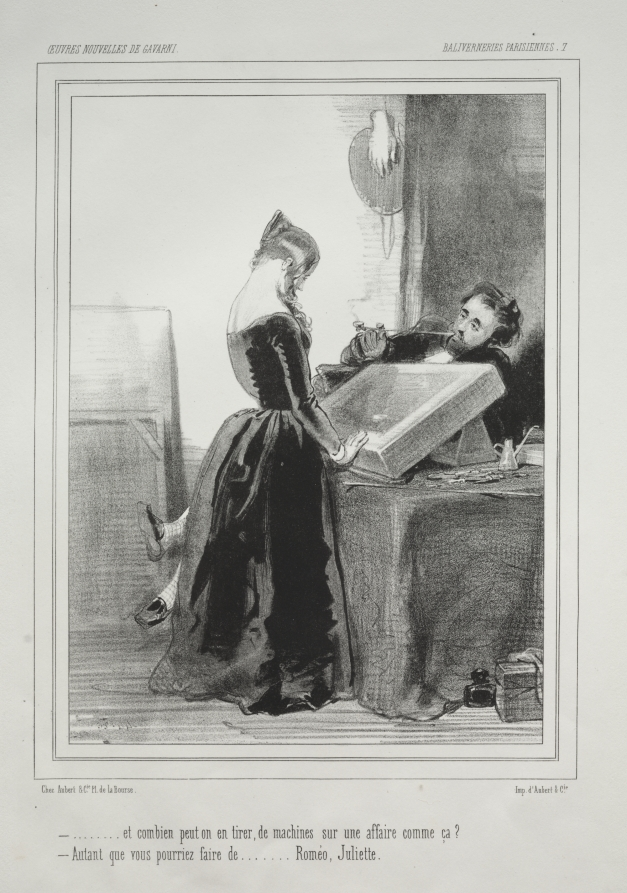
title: Baliverneries Parisiennes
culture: France, 19th century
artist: Paul Gavarni (French, 1804–1866)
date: c. 1847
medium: lithograph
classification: Print